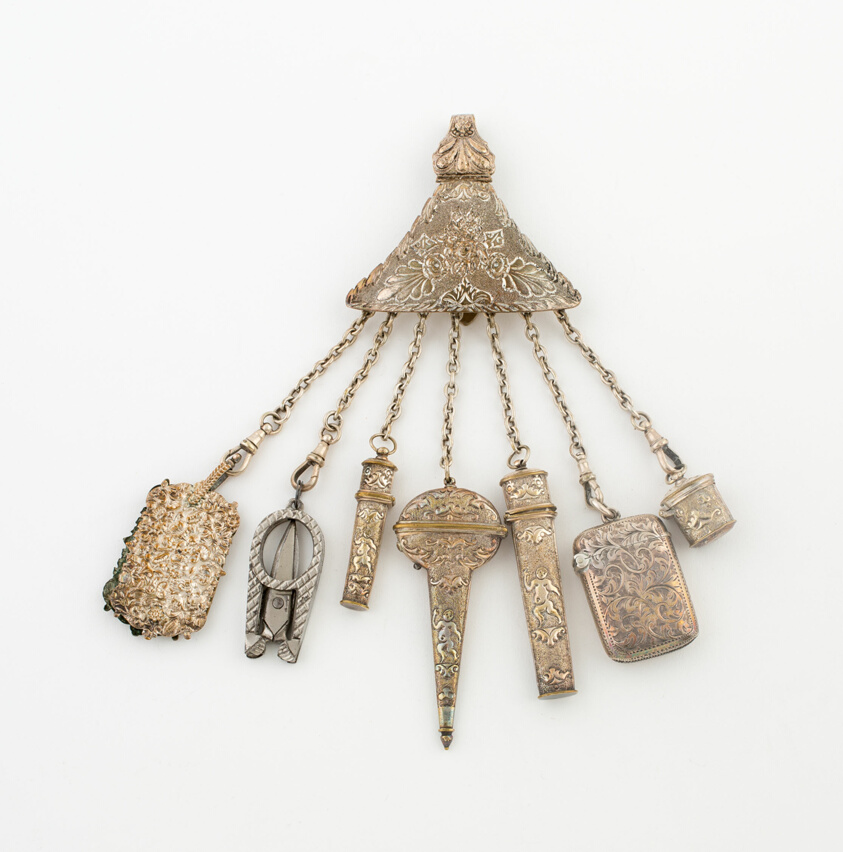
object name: Metalwork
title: Chatelaine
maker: Birmingham, England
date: 1901/02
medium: Silver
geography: Birmingham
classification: chatelaine; costume accessory worn at waist or below; costume accessory; european decorative arts; metalwork; silver; decorative object/ornament